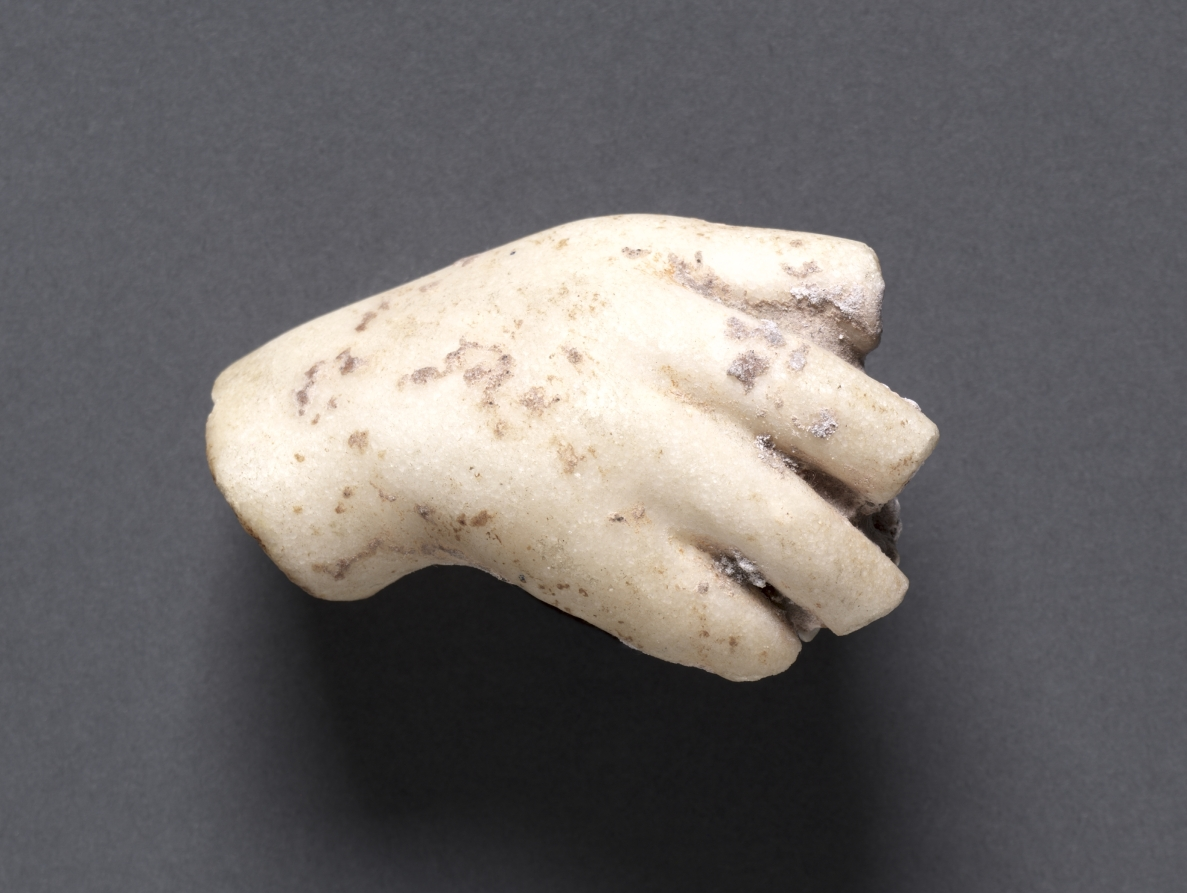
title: Fragment sent with "Dancing Lady": Fragment of a Proper Right Hand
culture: Greece, Alexandria(?)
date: c. 50 BCE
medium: marble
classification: Sculpture